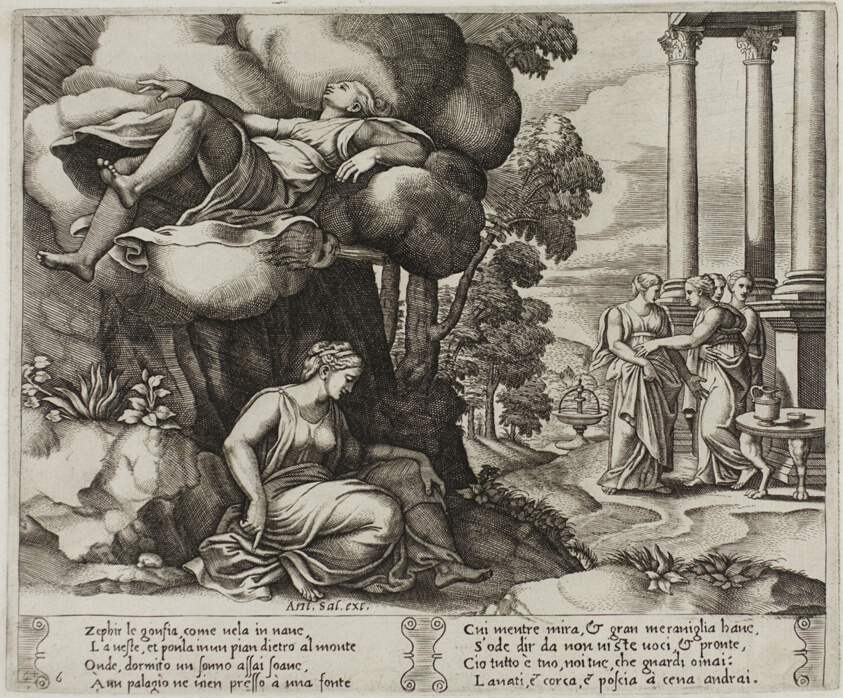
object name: Print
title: Zephyr Carrying Psyche Off to an Enchanted Palace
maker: Master of the Die (Italian, active c. 1530-1560); after Michiel Coxcie I (Flemish, 1499-1592); in turn, inspired by Raffaello Sanzio, called Raphael (Italian, 1483-1520)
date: 1530/40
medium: Engraving in warm brown ink on cream laid paper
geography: Italy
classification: engraving; print; prints and drawing